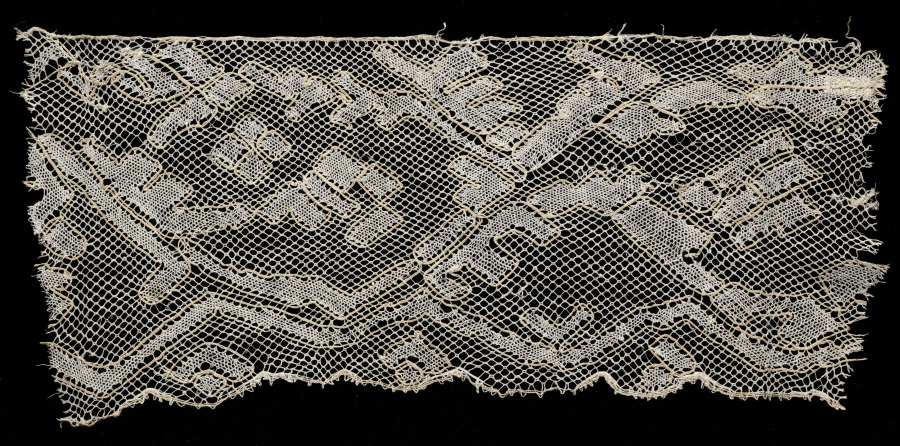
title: Lace Fragment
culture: Spain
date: 1700s–1800s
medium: Bobbin lace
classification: Lace